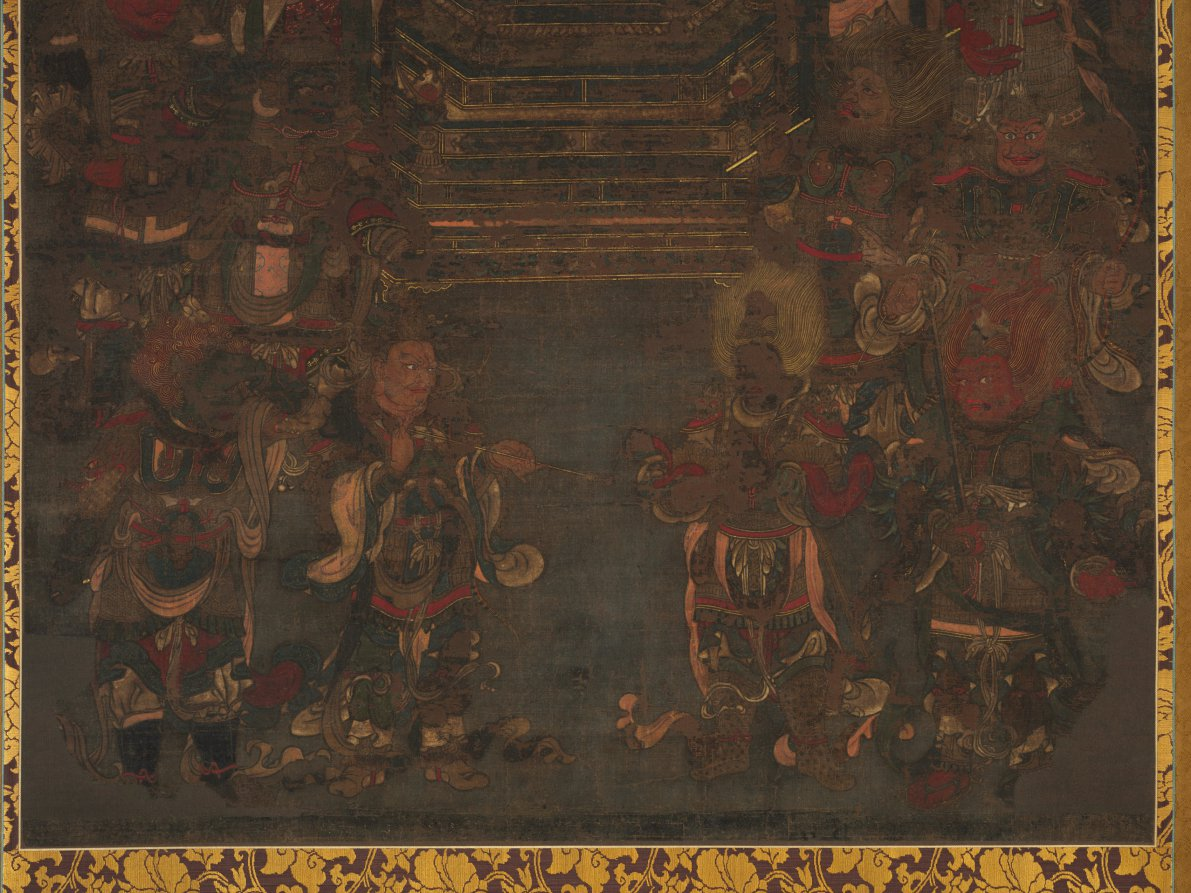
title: Medicine Master Buddha and the Twelve Divine Generals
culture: Japan, Kamakura period (1185–1333)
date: 1200s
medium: Hanging scroll painting; ink, color, gold, and silver on silk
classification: Painting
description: From the 700s, people in Japan began praying to the Medicine Master Buddha (Yakushi Nyorai) for longevity. Yakushi is at the center of this image, flanked by the bodhisattvas of the sun and moon, Nikkō and Gakkō. The Twelve Divine Generals, a group of protective deities, surround him. Yakushi sits in a meditative pose with his right hand in a gesture bestowing fearlessness while his left hand holds a medicine jar. In the upper part of the painting, rectangles simulating decorative paper inscription slips contain excerpts from a sacred text about Yakushi, in which he asks that sick people who speak his name should become well and that all who hear his name might have their purity restored.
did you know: Each of the Divine Generals has an identifying zodiac animal in his hair or headdress.